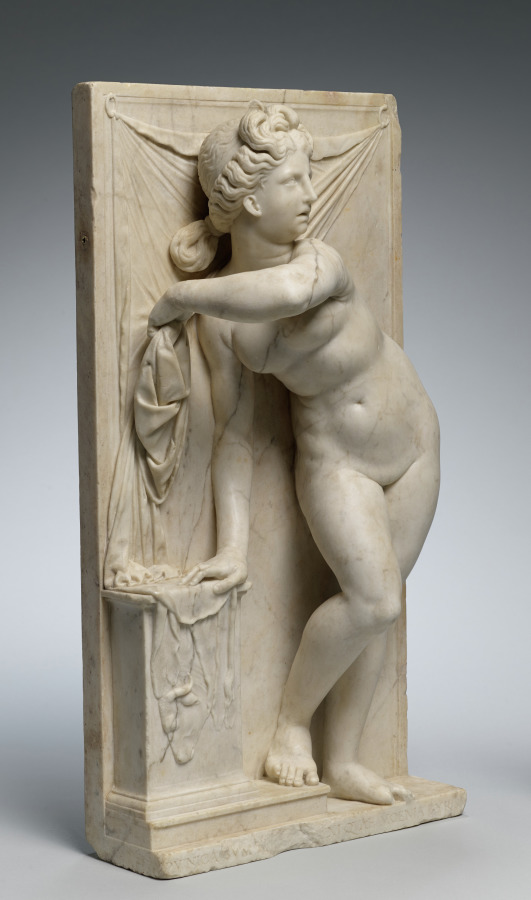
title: Dido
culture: Italy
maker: Aurelio Lombardo (Italian, 1501–1563)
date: c. 1525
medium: marble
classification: Sculpture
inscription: PVNICA SVM [DIDO ERE]XI QVAE MOENIA BYRSA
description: Artists customarily portrayed Dido as a forlorn lover abandoned by the Trojan hero, Aeneas, but here she is a conquering queen. Dido draws aside an oxhide curtain, a reference to the mythical founding of Carthage (in modern-day Tunisia, North Africa), when she was given an oxhide to demarcate granted land. By cutting it into thin strips she was able to encircle the future city. Dido was likely created for display in a studiolo, a place of study featuring refined works of art appreciated by humanist scholars and aficionados during the Renaissance.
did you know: Dido’s nudity and hairstyle are allusions to ancient Greek images of Aphrodite.